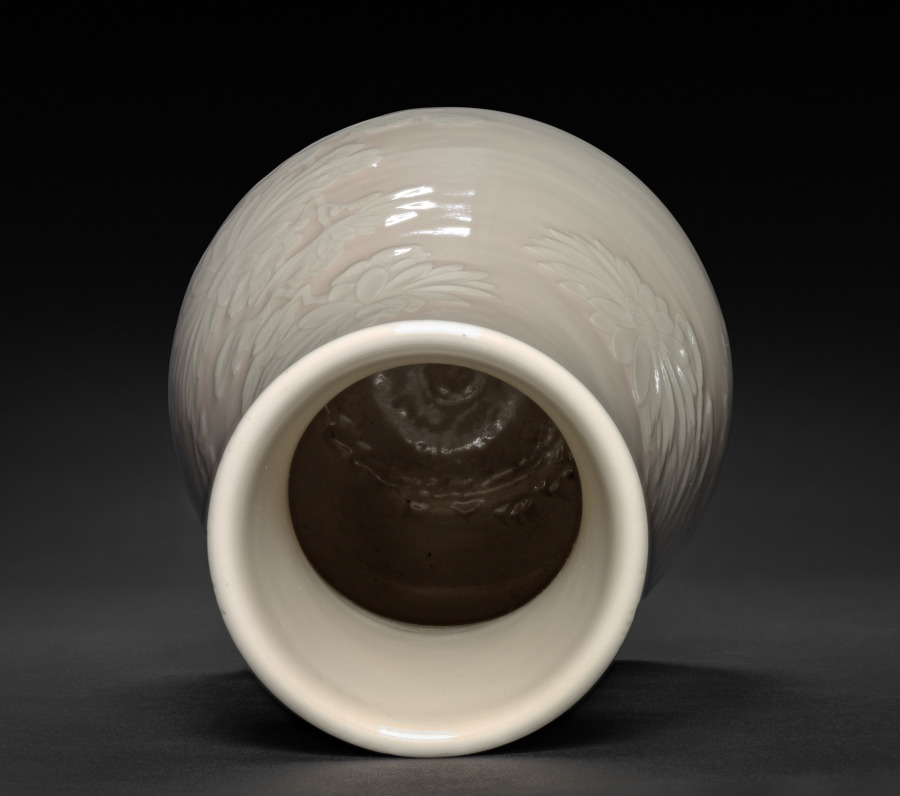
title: Flower Vase with Chrysanthemums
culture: Japan, Meiji period (1868–1912)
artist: Seifū Yohei IV (Japanese, 1872–1951)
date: 1914–46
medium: Porcelain with molded and carved design, underglaze pink, and cream glaze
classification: Ceramic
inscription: 清風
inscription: 清風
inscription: 清風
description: In creating this kanpakuji (or "bright-jewel white porcelain") vase, Yohei IV has applied his father’s signature creamy translucent glaze in combination with underglaze pink gradation surrounding motifs in low relief over an ivory clay body. This method was used to achieve the creamy white of the stalks, leaves, buds, and flowers of the elaborate design of chrysanthemum flowers in diverse stages of bloom.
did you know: The ivory and pink vase by Yohei IV show his father’s “bright-jewel white porcelain” technique.